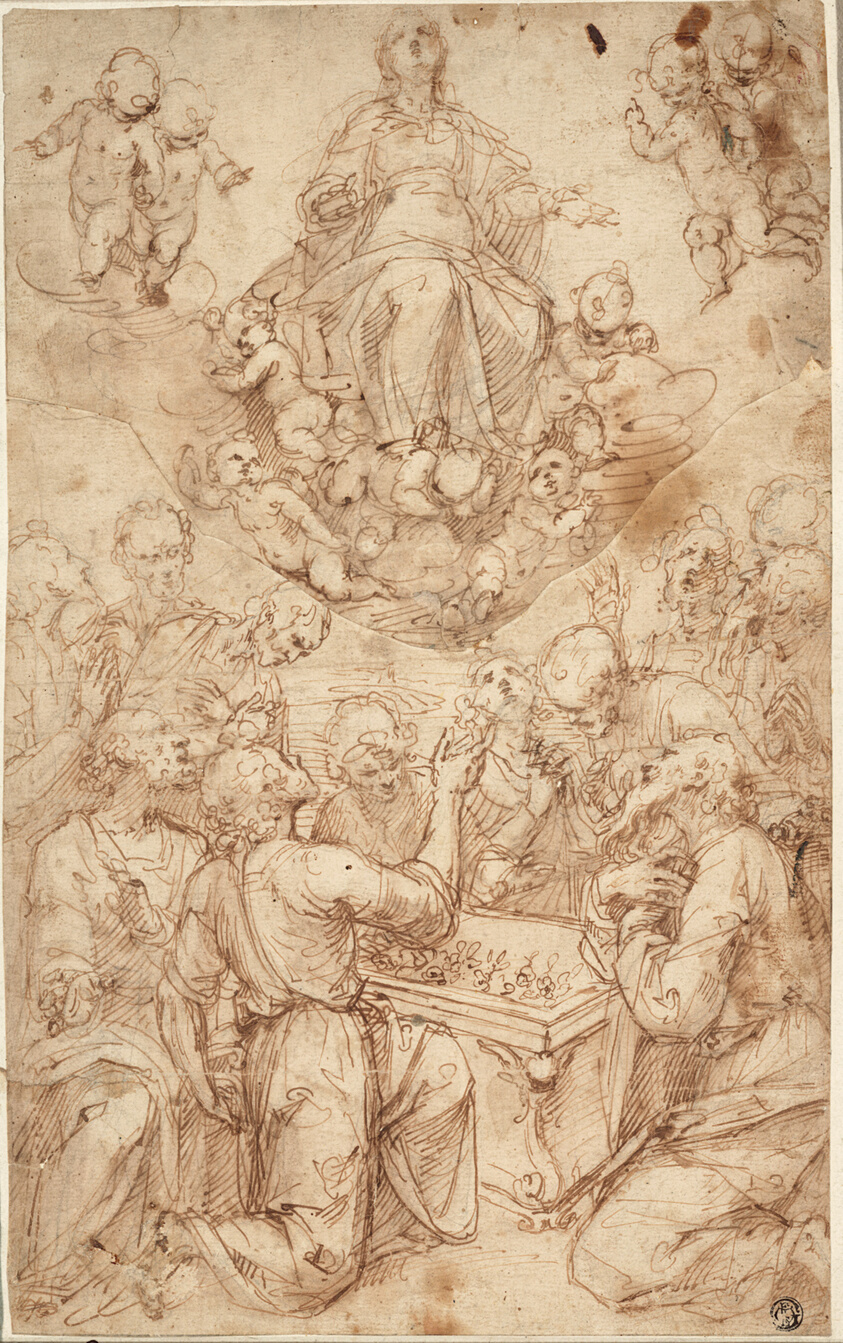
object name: Drawing and Watercolor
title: Assumption of the Virgin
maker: Guglielmo Caccia, called Il Moncalvo; Italian, 1568-1625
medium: Pen and brown ink, with brush and brown wash, over traces of graphite, on ivory laid paper, pieced and laid down on ivory laid paper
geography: Italy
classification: pen and ink drawings; drawings (visual works); prints and drawing